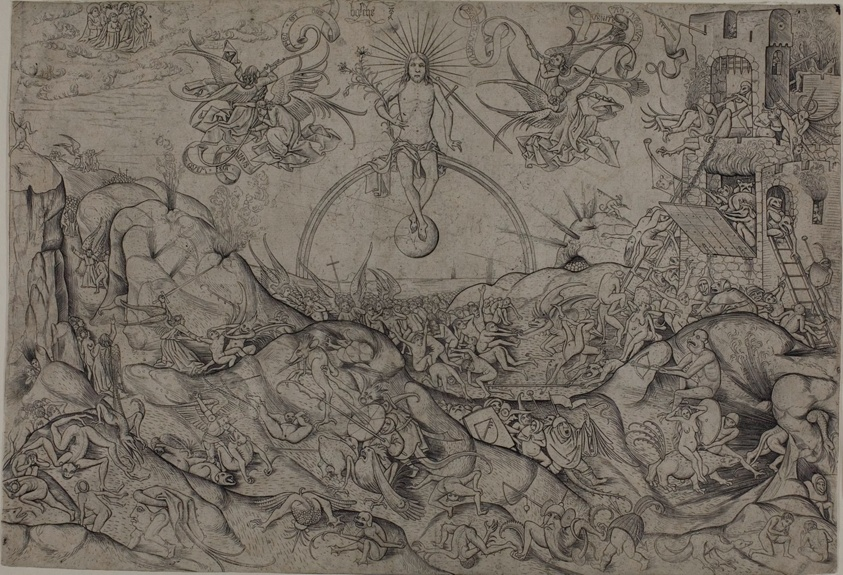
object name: Print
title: The Last Judgment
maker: Alart du Hameel (Netherlandish, c. 1449–c. 1506); after Hieronymus Bosch (Netherlandish, c. 1450-1516)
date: 1478/1506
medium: Engraving in black on buff laid paper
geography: Netherlands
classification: engraving; print; prints and drawing